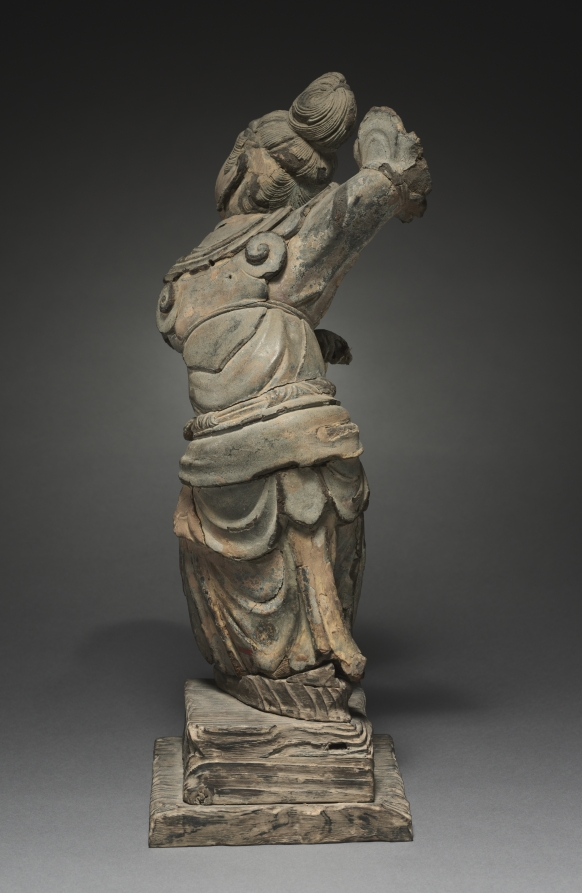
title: Dancing Apsaras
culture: China, late Tang dynasty (618–907) to Five dynasties (907–960)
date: 900s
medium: dry lacquer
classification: Sculpture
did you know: The sculpture was made from a rare technique involving alternate layers of cloth and lacquer, modeled on an armature or around a removable clay core.